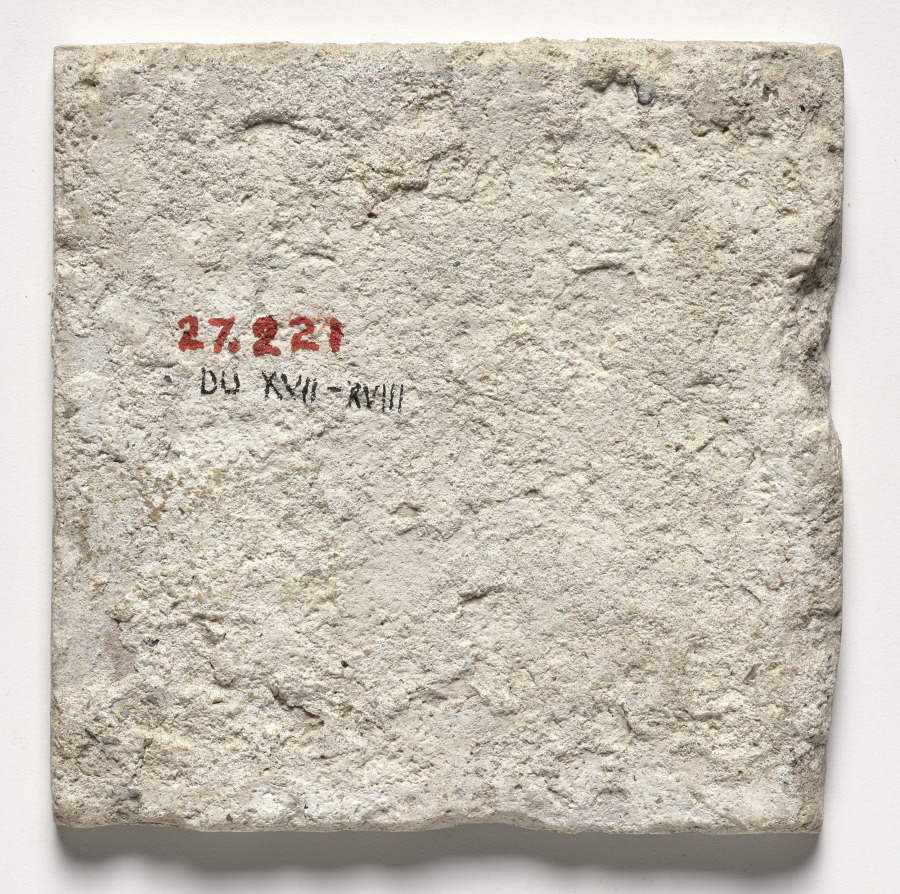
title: Tile- New Testament Scene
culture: Netherlands, Holland, Delft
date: c 1600– 1700s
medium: glazed ceramic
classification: Ceramic